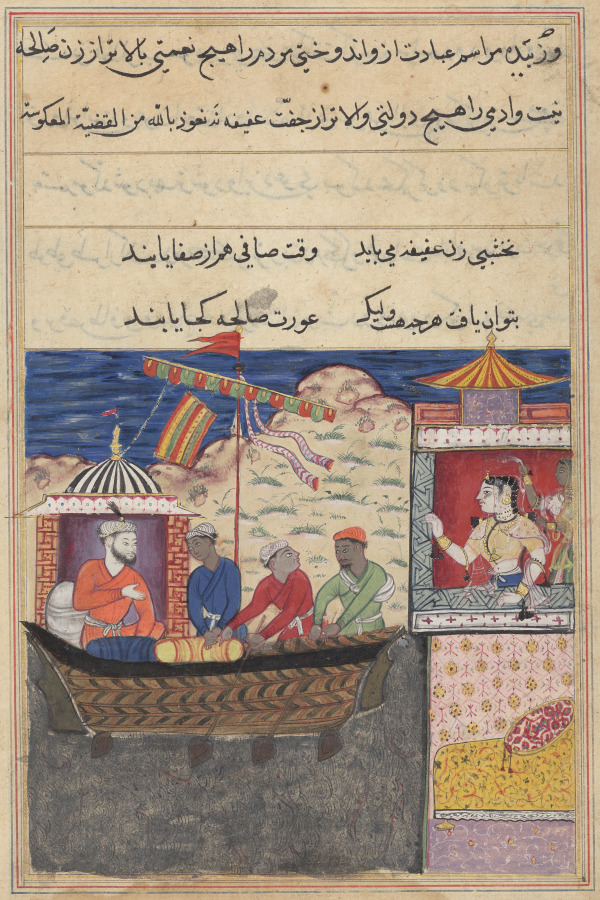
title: The merchant Mansur departs on a sea voyage, leaving his wife behind, from a Tuti-nama (Tales of a Parrot): Seventeenth Night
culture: Mughal India, court of Akbar (reigned 1556–1605)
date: c. 1560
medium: gum tempera, ink, and gold on paper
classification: Painting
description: Mansur, a wealthy and successful merchant, prepares to leave home on a long and dangerous journey. He sits dressed in orange at the head of his ship alongside a group of assistants. His wife, renowned for her virtue and beauty, sees him off from her second-story chamber.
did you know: Thirteen fish are hidden in the dark waters beneath Mansur’s ship.